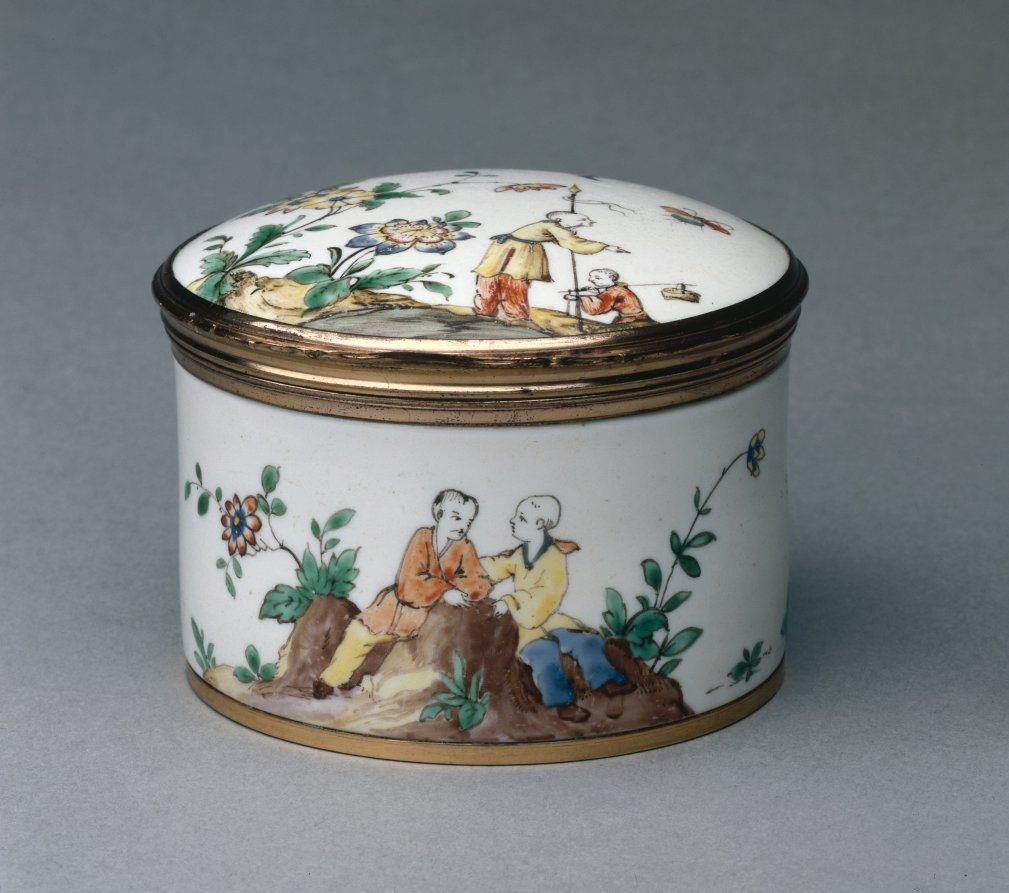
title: Snuff Box (Tabatière)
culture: France, 18th century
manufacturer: Chantilly Porcelain Factory (French)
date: c. 1745–1750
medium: Tin-glazed soft-paste porcelain with enamel decoration; gilded metal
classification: Ceramic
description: This snuff box’s decoration departs from the practice of early Chantilly porcelain that drew inspiration from Chinese and Japanese porcelain compositions, techniques, and motifs. Rather than compositions modeled directly from East-Asian porcelain, the paintings on this box may have been influenced by European chinoiserie, imitations of Chinese and Japanese decoration that pulled from the European imagination rather than accurate depictions of these cultures.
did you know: The enamels on this box are no longer applied flat without shading as was typical of early production at the Chantilly factory, but have been painted in a way that suggests depth through depictions of light and shadow.